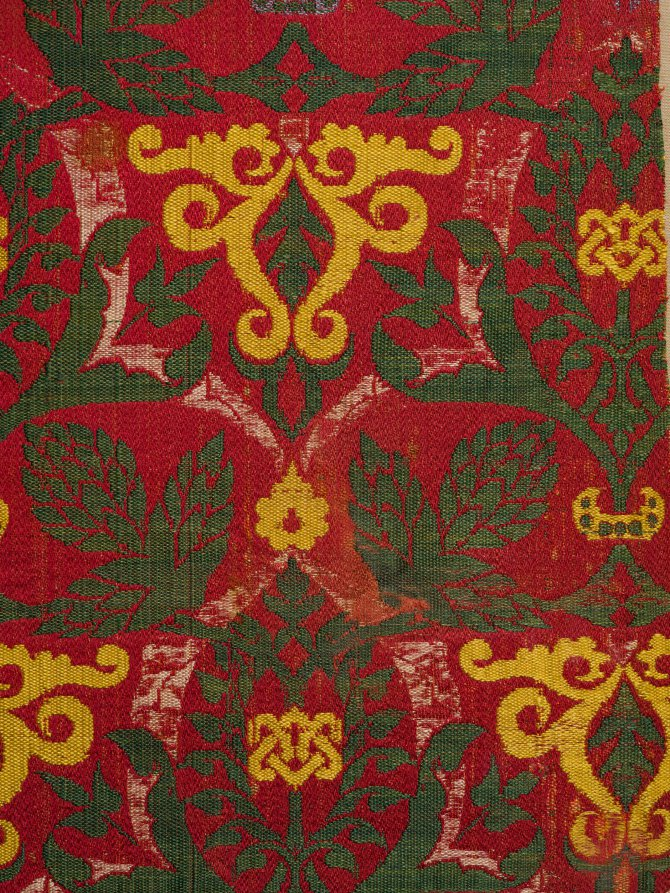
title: Fragment with curving vine and palmette leaves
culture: Spain, Granada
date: 1400s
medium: Silk: lampas weave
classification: Textile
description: The sophisticated combination of elements in this colorful fragment include large split palmette leaves in ivory silk framing yellow interlacing knots in a leafy surround. Prominent floral buds are arranged with dynamic effect in staggered rows. Foral motifs became increasingly prominent on textiles during the 1400s, supplanting geometric patterns.